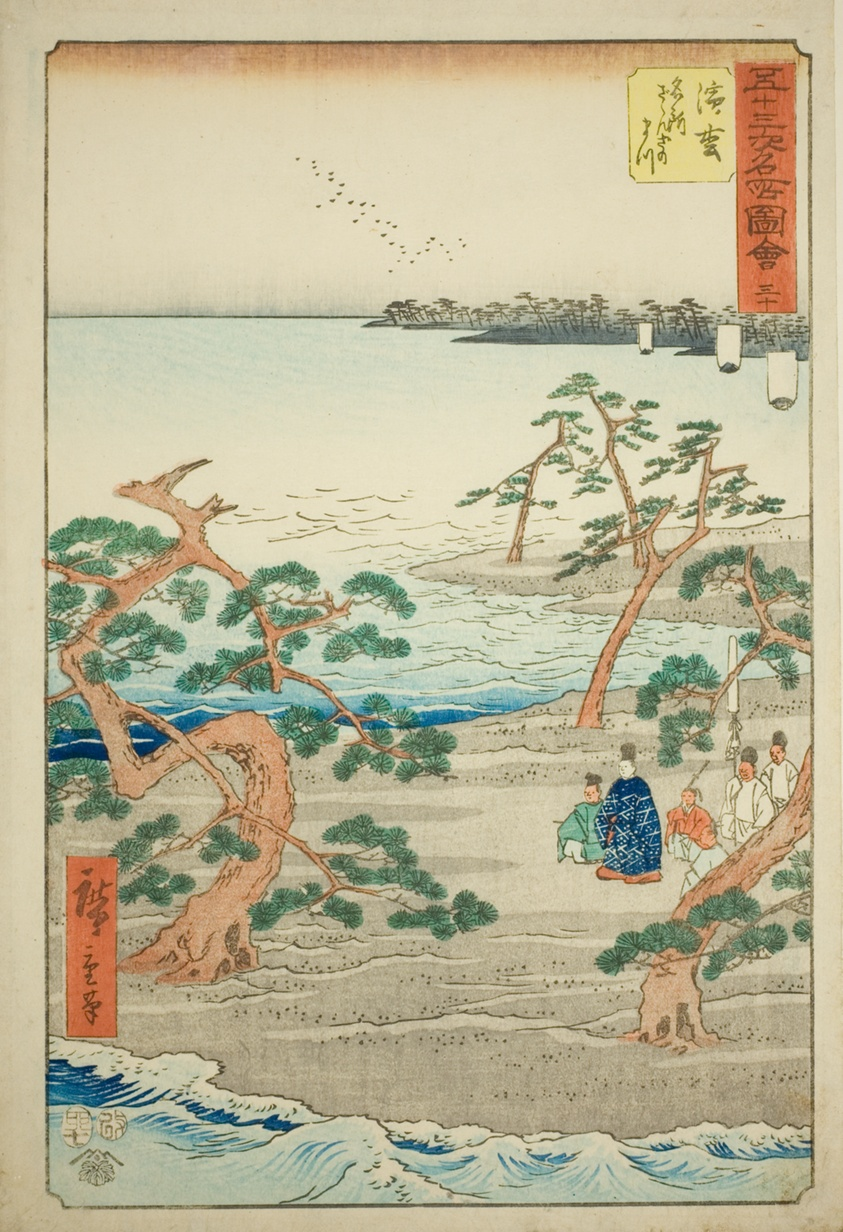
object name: Print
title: Hamamatsu: The Famous Murmuring Pines (Hamamatsu, meisho zazanza no matsu), no. 30 from the series "Famous Sights of the Fifty-three Stations (Gojusan tsugi meisho zue)," also known as the Vertical Tokaido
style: Japanese (culture or style)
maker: Utagawa Hiroshige 歌川 広重; Japanese, 1797-1858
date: 1855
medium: Color woodblock print; oban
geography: Japan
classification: woodblock print; print; asian art